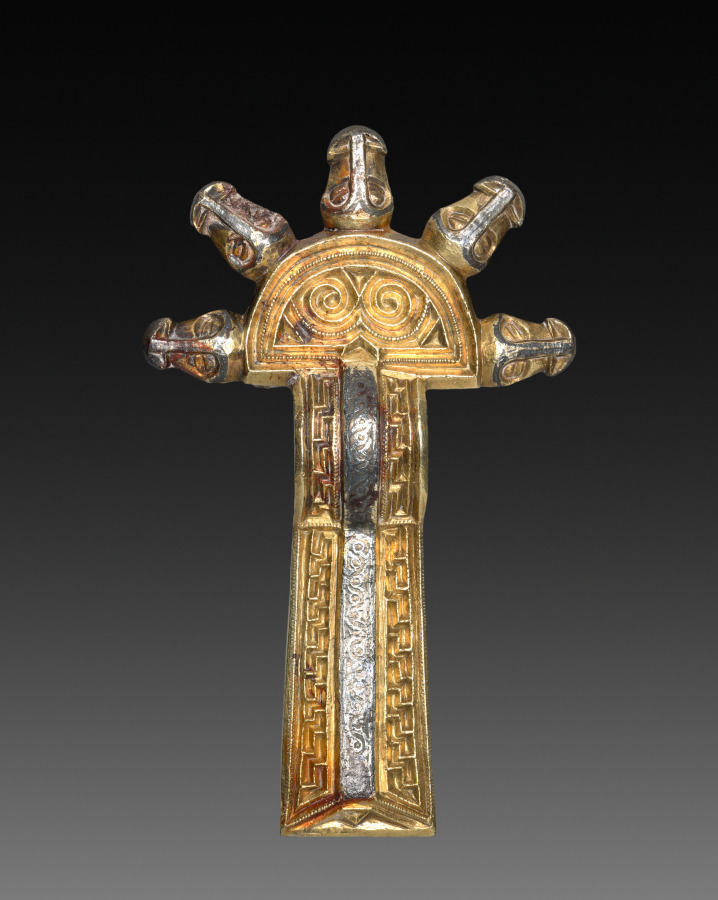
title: Fibulae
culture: Alemannic, Migration Period, 6th-7th century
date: 500s-600s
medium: cast silver, parcel-gilt, with niello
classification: Jewelry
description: A woman of high rank might have worn these twin fibulae on her shoulders, one fastening her inner garment on the right, the other her outer garment on the left. She might also have suspended them from her belt as decorative ornaments